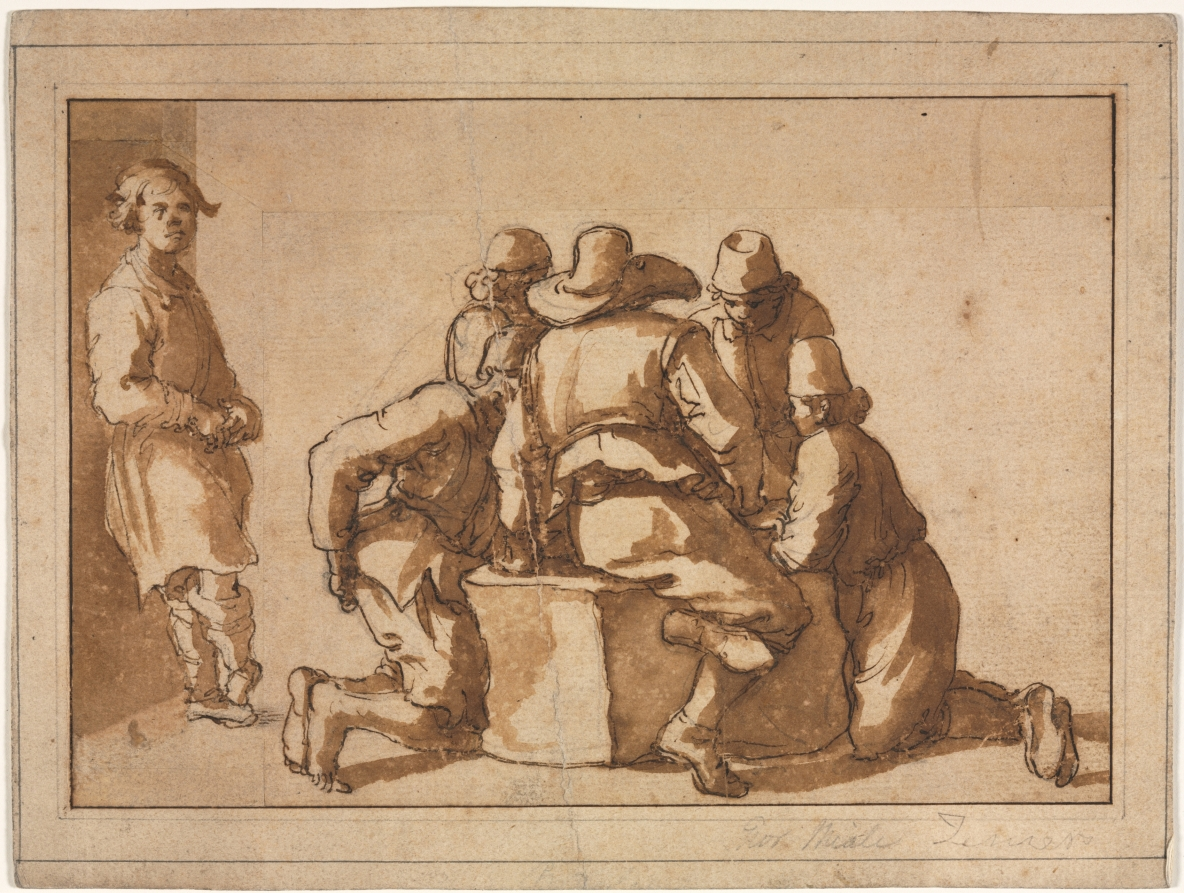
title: Genre Scene of Young Men Playing a Game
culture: Italy, 16th century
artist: attributed to Frederico Zuccaro (Italian, 1540/1–1609)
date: c. 1550s-1609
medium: pen and brown ink and brush and brown wash over graphite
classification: Drawing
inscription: secondary suuport, lower right, in graphite: [illegible] Miali[?] Zuccaro[?]